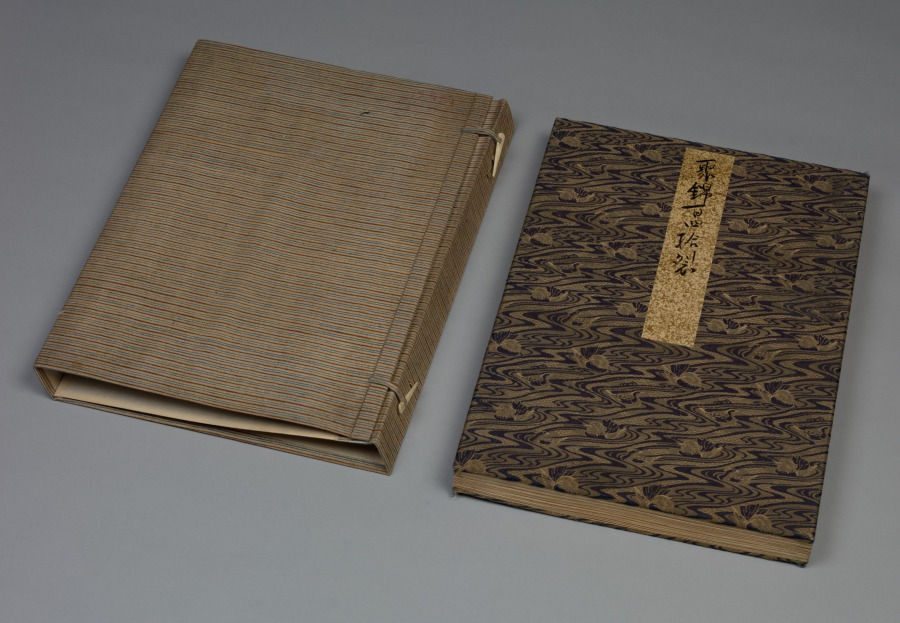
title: Album of Textile Samples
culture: Japan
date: 1790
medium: silk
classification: Textile